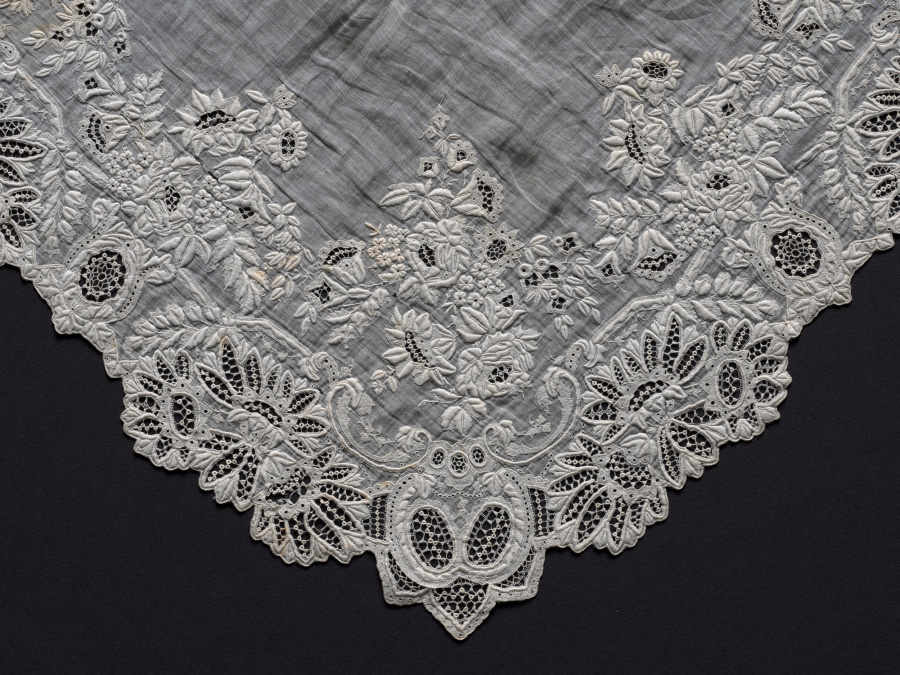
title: Embroidered Handkerchief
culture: Switzerland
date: 1800s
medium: Plain weave linen: cotton embroidery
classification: Embroidery